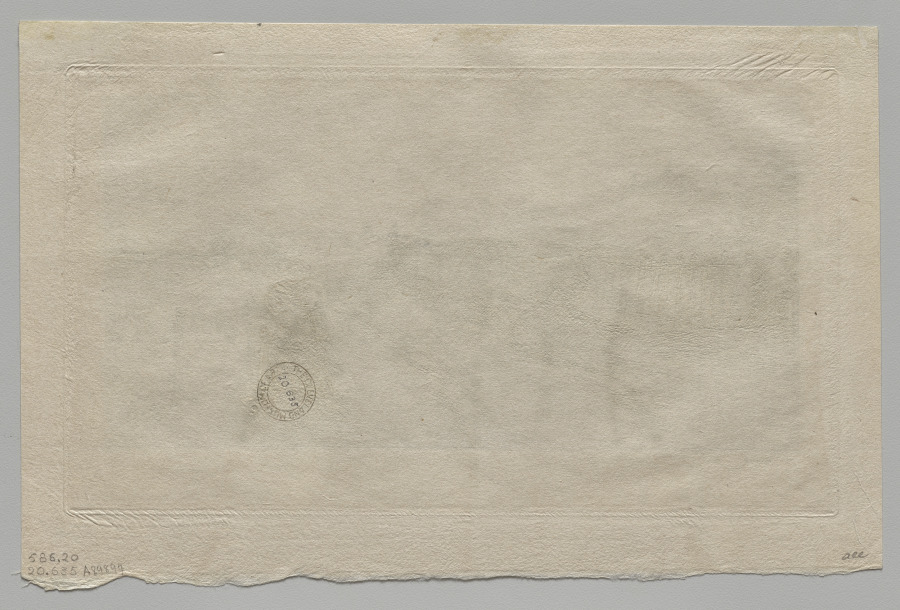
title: At the Fortifications, Porte de Versailles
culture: France, 19th century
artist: Auguste Louis Lepère (French, 1849–1918)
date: 1898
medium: etching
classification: Print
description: Paris underwent a dramatic redesign beginning in the mid-1800s, resulting in its distinctive appearance today but also in the displacement of residents who worked—but could not afford to live—in the city. In this print, Auguste Lepère presented the “zone,” an area on Paris’s periphery where its most economically disadvantaged and disenfranchised inhabitants lived, including some laundresses. Lepère’s image features a laundry line as the singular domestic touch within an otherwise surreal landscape, part of the city but seemingly rural. The inhabitants of the zone used open land to construct makeshift homes without modern amenities, so that they could subsist on the low wages offered by their urban employment.